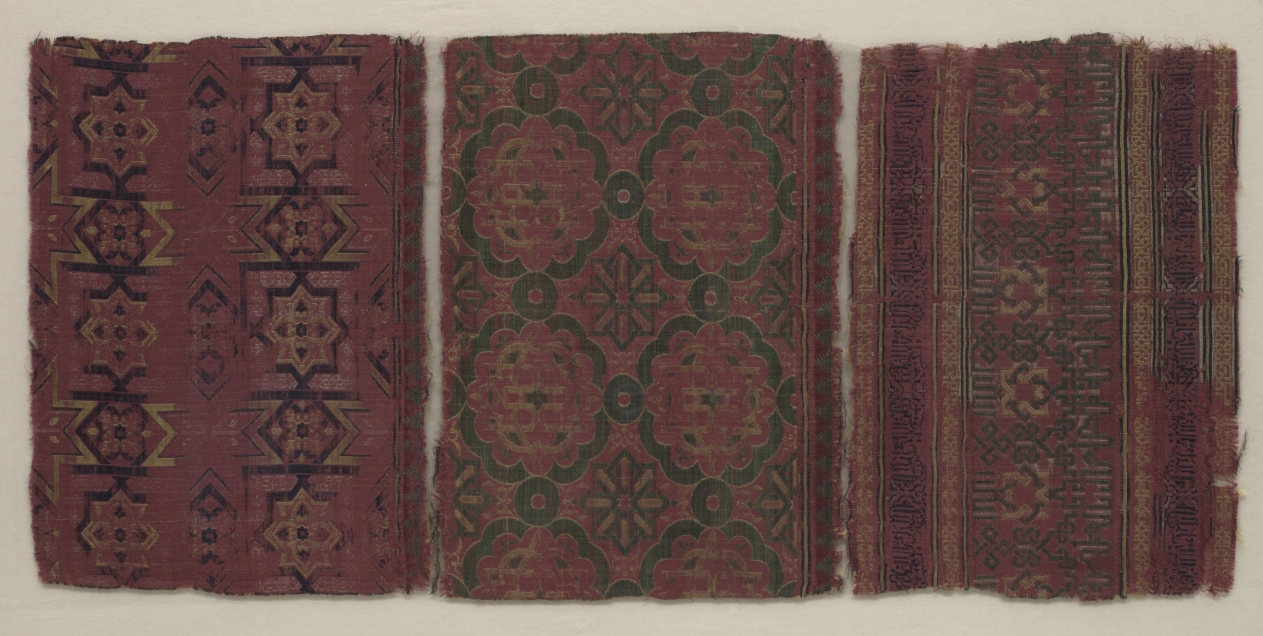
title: Silk Fragment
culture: Spain, Granada, Hispano-Islamic, 14th century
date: 1300s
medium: Silk: lampas weave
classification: Textile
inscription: third field at bottom consists of a composite band, knotted Kufic ("enduring glory [surpassing ?] support") framed to either side by bands with Naskhi inscriptions in cartouches, knotwork and crenelations (Naskhi inscription too worn to read).